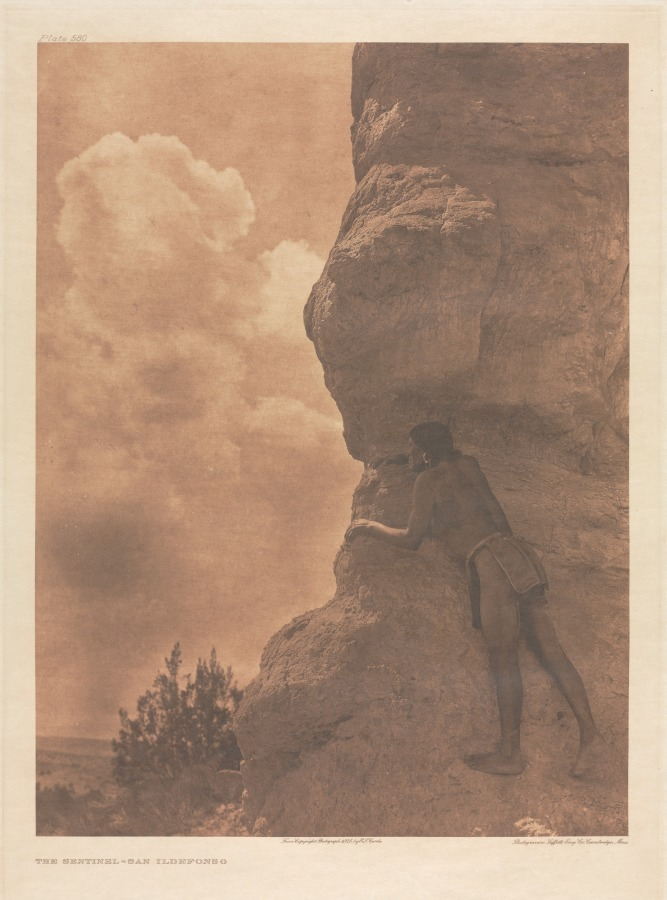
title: Portfolio XVII, Plates 580- 615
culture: America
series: The North American Indian: being a series of volumes picturing and describing the Indians of the United States, The Dominion of Canada, and Alaska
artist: Edward S. Curtis (American, 1868–1952)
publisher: The University Press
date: 1903–26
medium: photogravure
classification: Portfolio